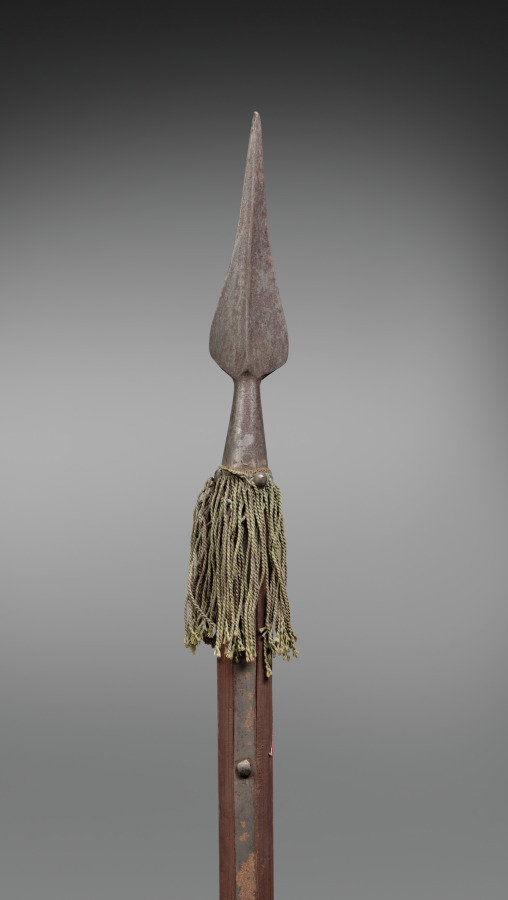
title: Pole for Banner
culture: Spain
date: 1700s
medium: wood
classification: Arms and Armor